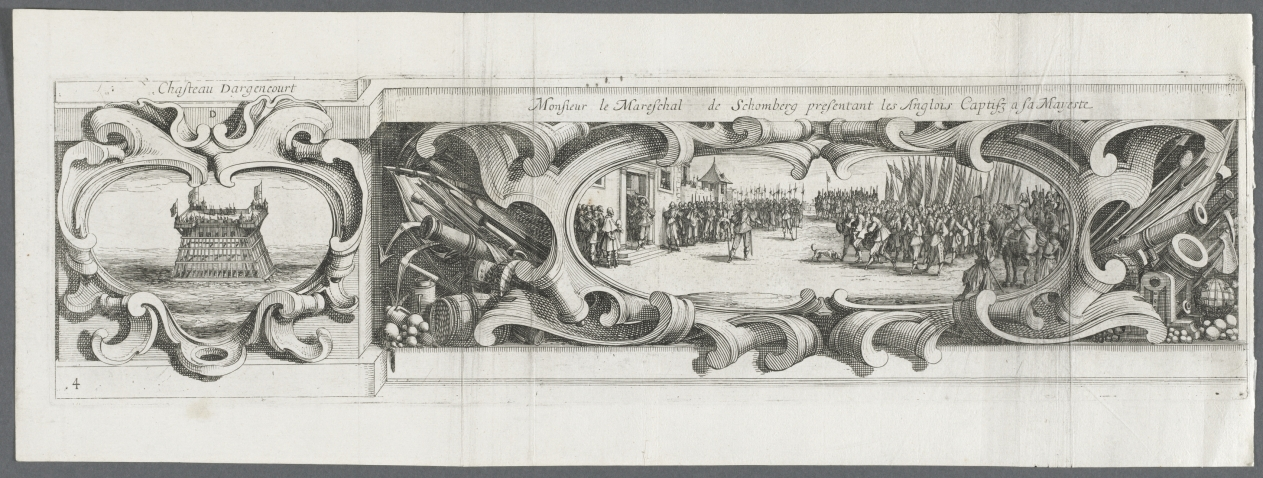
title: The Siege of La Rochelle: Plate 14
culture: France, 17th century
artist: Israël Henriet (French, c. 1590–1661)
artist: or Abraham Bosse (French, 1602–1676)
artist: after Jacques Callot (French, 1592–1635)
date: 1628–1630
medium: etching and engraving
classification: Print